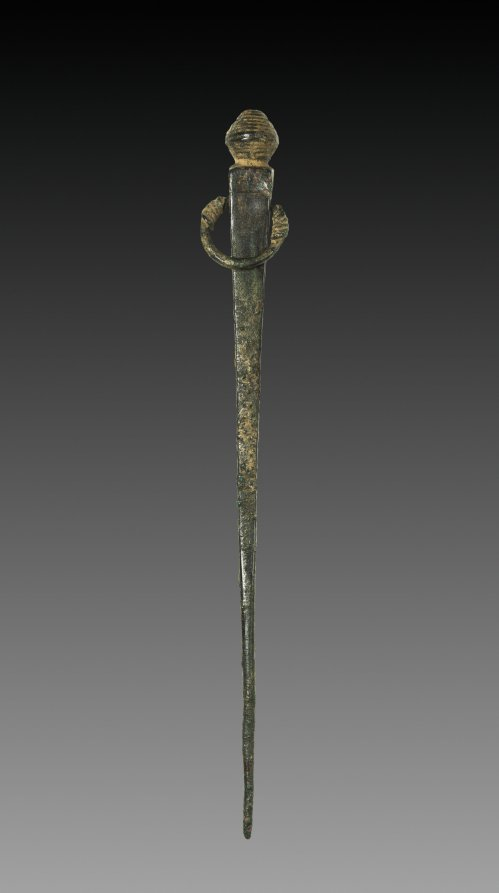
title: Cotter Pin for Chariot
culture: Iran, Luristan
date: 2000–1000 BCE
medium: bronze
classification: Metalwork